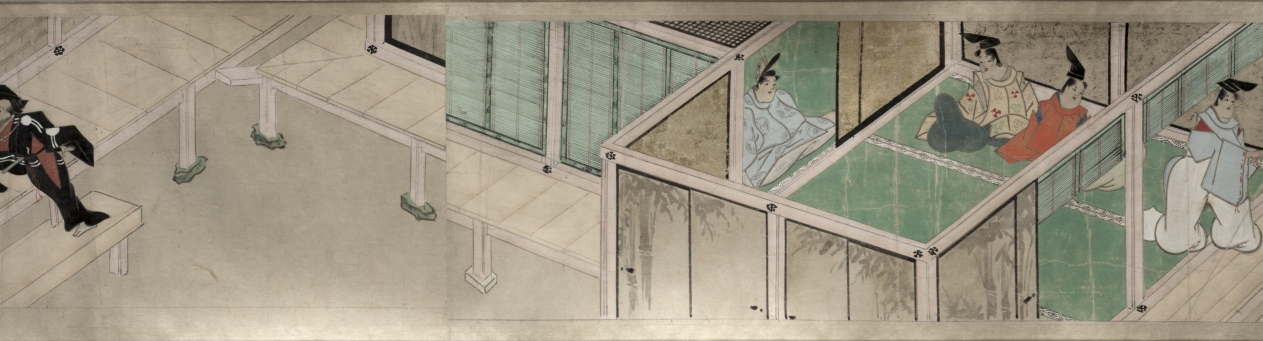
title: The Saltmaker's Story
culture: Japan, Edo period (1615–1868)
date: early 1600s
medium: One of a pair of handscrolls; ink, color, and gold on paper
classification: Painting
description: Once read and copied by girls at New Year’s celebrations and included in dowries, The Saltmaker’s Story is a rags-to-riches tale in which daughters are gifts from the gods. Despite his simple outlook, the main character progresses from humble roots as an associate at Kashima Shrine to the elite status of grandfather of the emperor through the intervention of the Kashima deity. The Saltmaker’s Story is traditionally presented in a set of three scrolls, but the text of this set has been removed by a previous owner, who remounted the illustrations as a pair. The paintings of this one take us from right to left through the second half of the tale.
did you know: This handscroll originally had texts before its paintings, but the texts were removed.